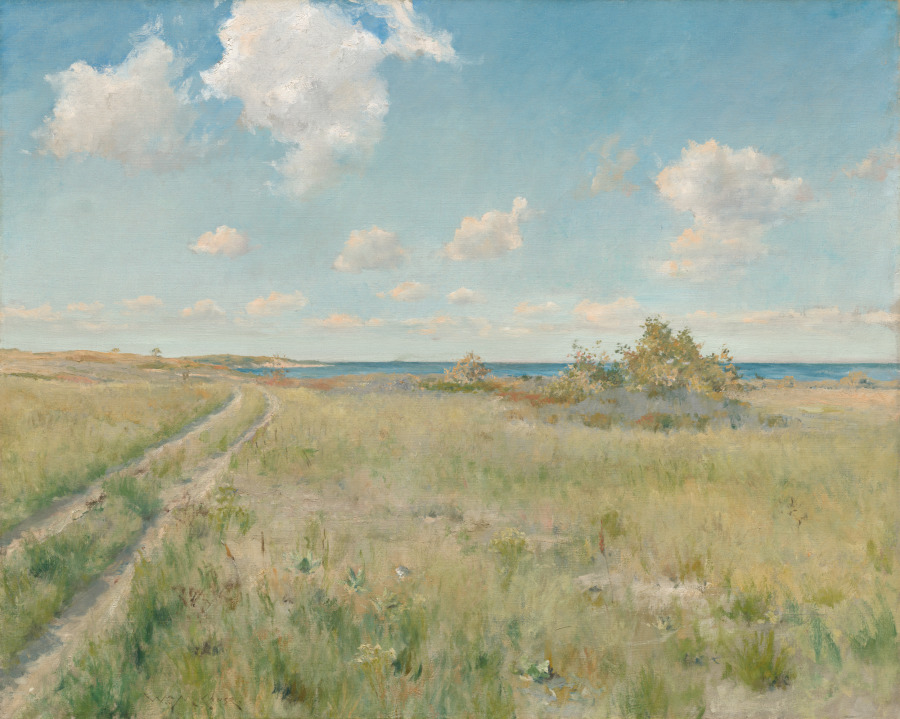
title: The Old Road to the Sea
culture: America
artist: William Merritt Chase (American, 1849–1916)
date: c. 1893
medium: oil on canvas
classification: Painting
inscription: signed lower left: WM M. Chase [WM in monogram]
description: One of the most influential of the American Impressionists, William Merritt Chase established his own summer school at Shinnecock, on the eastern tip of Long Island, New York. Attracted to the low-lying dunes and beaches, Chase and his students were among the first American artists to pursue open-air painting. With its varied brushwork and warm colors, this painting is among the finest works Chase produced at Shinnecock. The panoramic scene glows with the light of a summer day. The Chase school at Shinnecock, active from 1891-1902, was instrumental in expanding the influence of Impressionism in the United States.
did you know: Chase loved big dogs, variously owning a greyhound, a borzoi, and an Irish wolfhound.